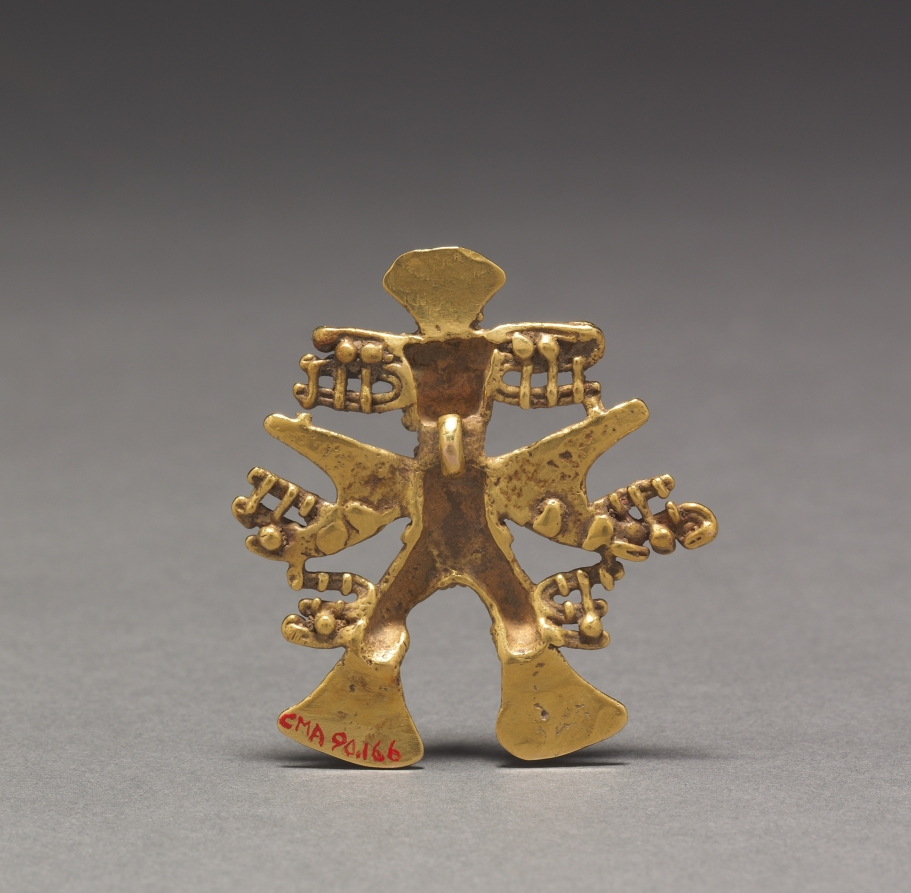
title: Figurine Pendant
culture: Southern Costa Rica, (Diquís Region), Diquís Style, c. 700-1550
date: c. 700–1550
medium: cast and hammered gold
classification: Metalwork